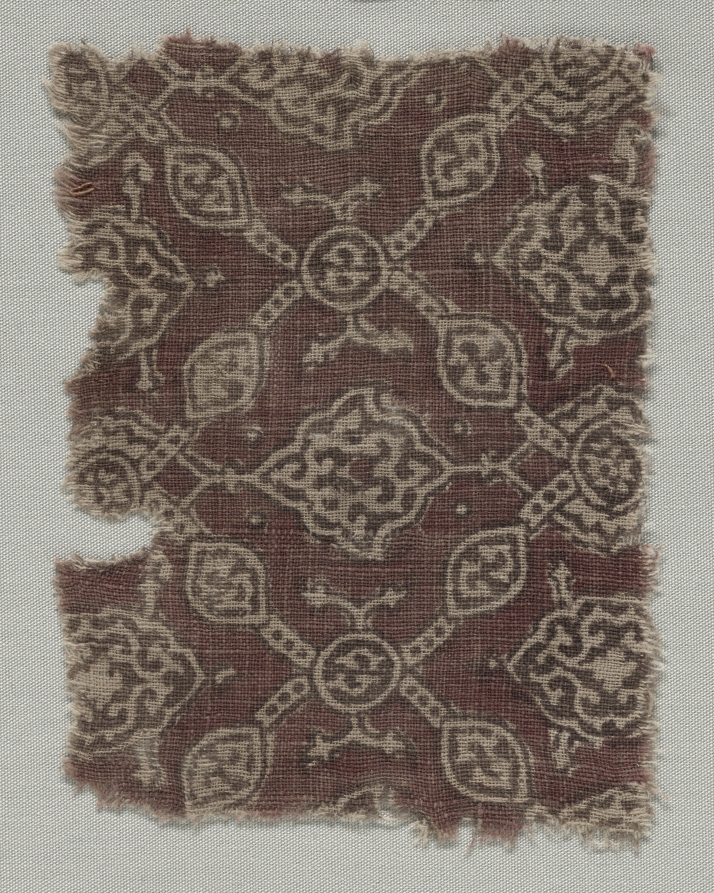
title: Fragment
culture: India, 15th century (?)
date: 1400s (?)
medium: stamped and painted (?) mordants, dyed; cotton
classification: Textile